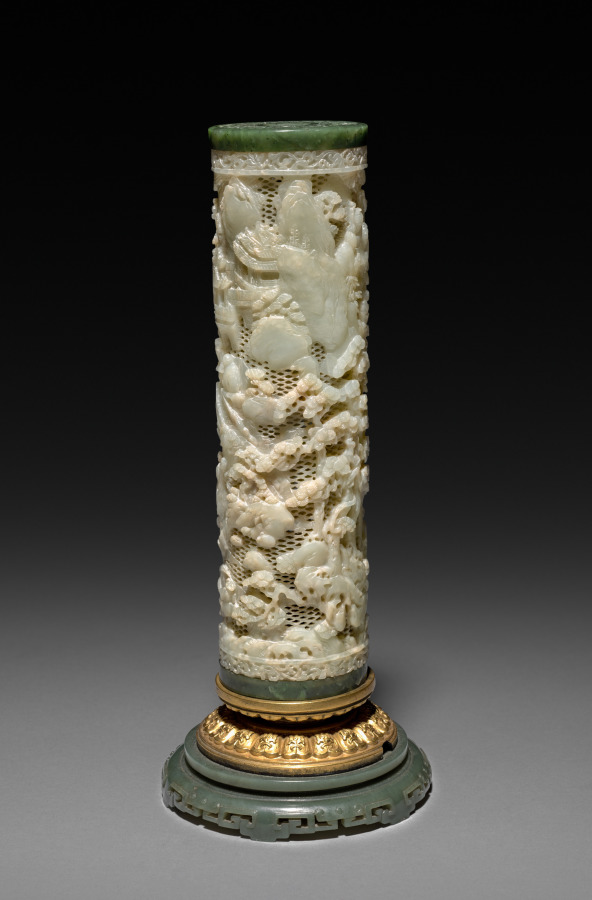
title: Cylinder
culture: China, Qing dynasty (1644-1911) or Republican period (1912-49)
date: 1800–1940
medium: jade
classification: Jade